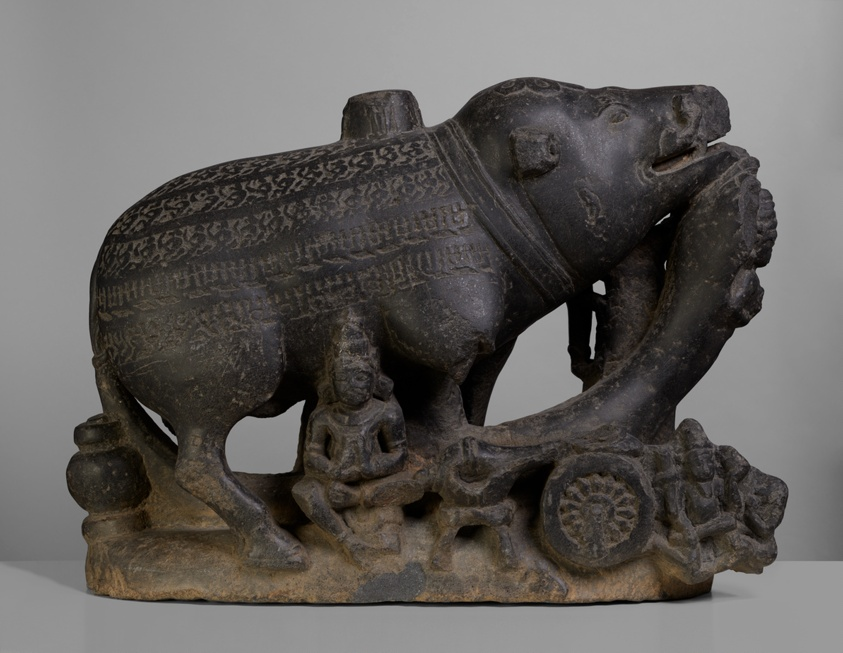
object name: Sculpture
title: Boar Incarnation of God Vishnu (Varaha)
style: South Asian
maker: India; Madhya Pradesh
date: c. 10th century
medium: Phyllite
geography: Madhya Pradesh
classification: stone; sculpture; asian art